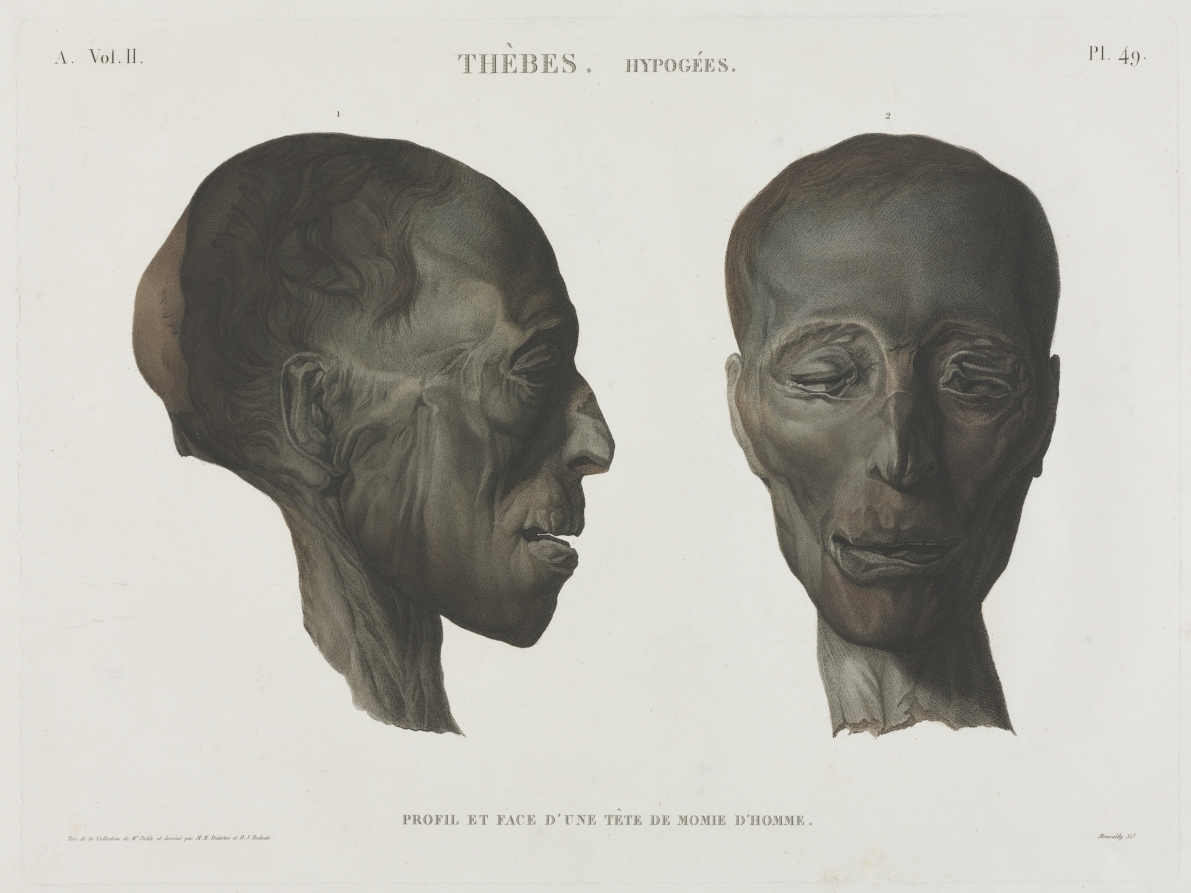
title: Description of Egypt: Thebes. Hypogees Vol. II, Pl. 49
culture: France, 19th century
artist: Antoine Maxime Monsaldy (French, 1768–1816)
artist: after André Dutertre (French, 1753–1842)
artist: after Henri Joseph Redouté (French, 1766–1853)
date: c. 1812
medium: etching, hand-colored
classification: Print